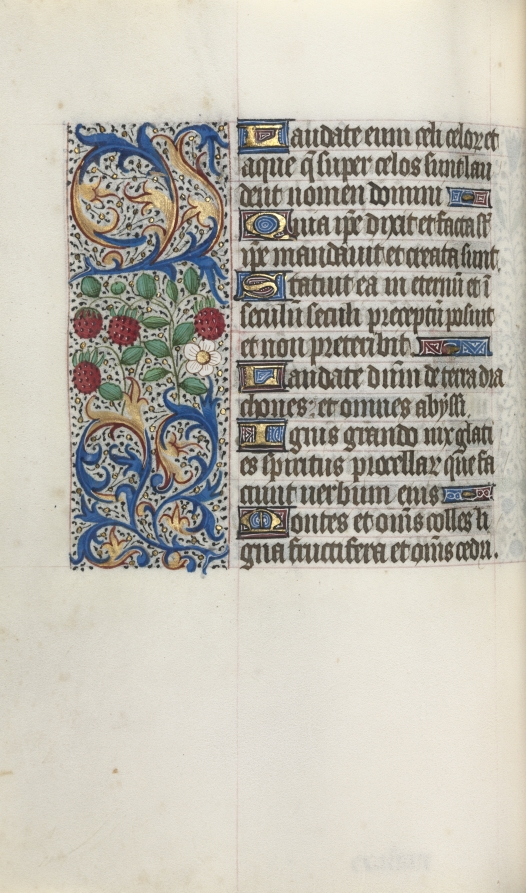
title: Book of Hours (Use of Rouen): fol. 44v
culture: France, Rouen, 15th century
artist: Master of the Geneva Latini (French, active Rouen, 1460–80)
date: c. 1470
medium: ink, tempera, and gold on vellum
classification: Bound Volume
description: In the late 1400s and early 1500s Rouen was an established and important center of book production. The city’s cathedral had a wealthy chapter that spent large sums of money to commission books and to maintain its extensive library. The stationers and booksellers would have likely been concentrated in or near the cathedral precinct. This artist, named after a manuscript now in Geneva, was Rouen’s principal illuminator during the second half of the 1400s.